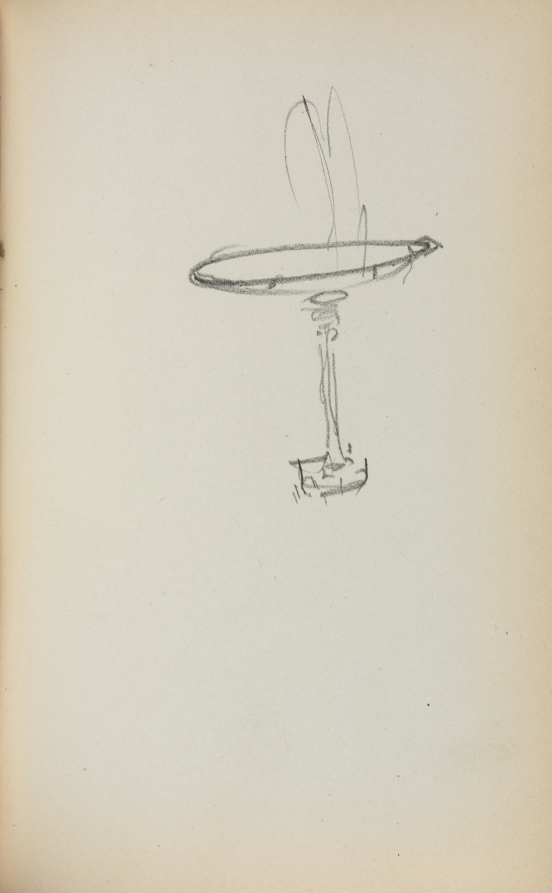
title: Italian Sketchbook: Fountain (page 145)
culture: America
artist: Maurice Prendergast (American, born Newfoundland [now Canada], 1858–1924)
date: 1898–1899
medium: pencil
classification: Bound Volume